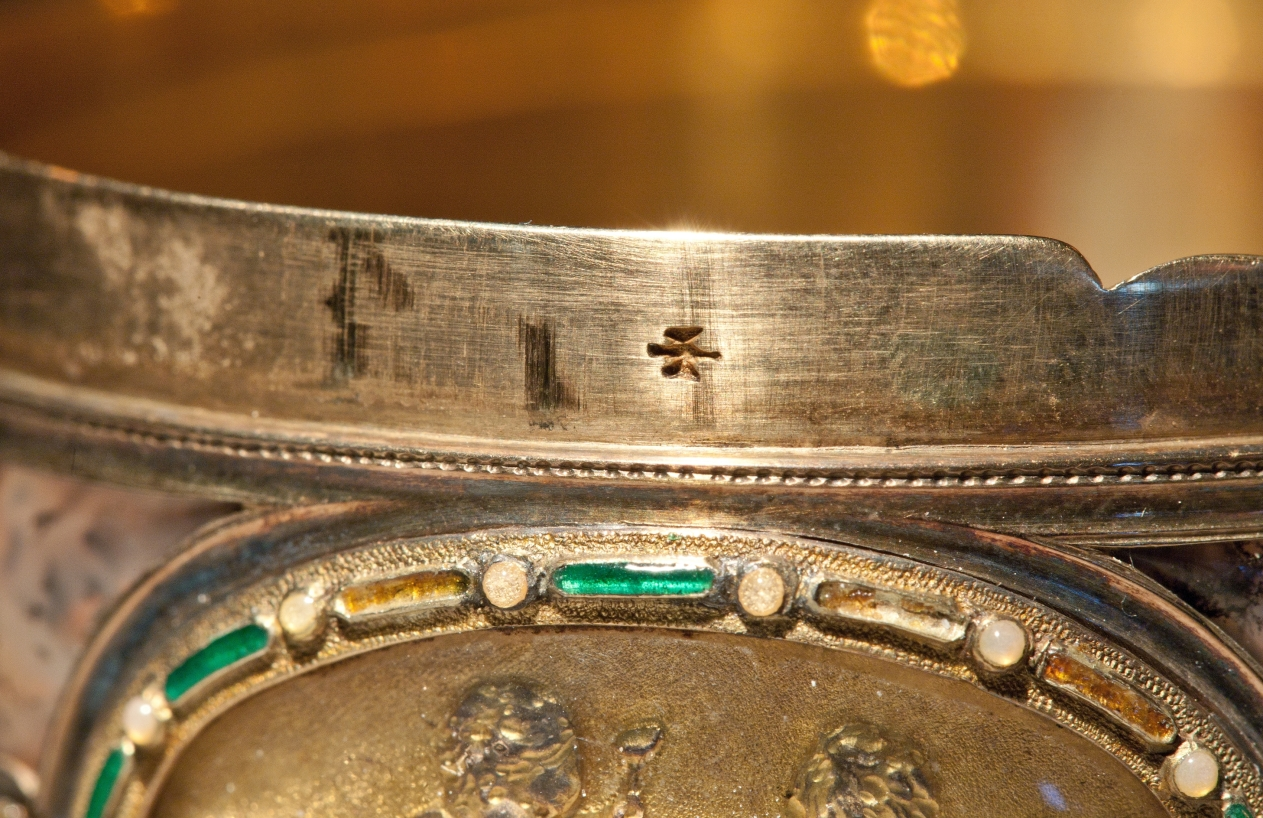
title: Snuff Box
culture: France, Paris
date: c. 1880–1900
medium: gold, enamel, agate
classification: Miscellaneous